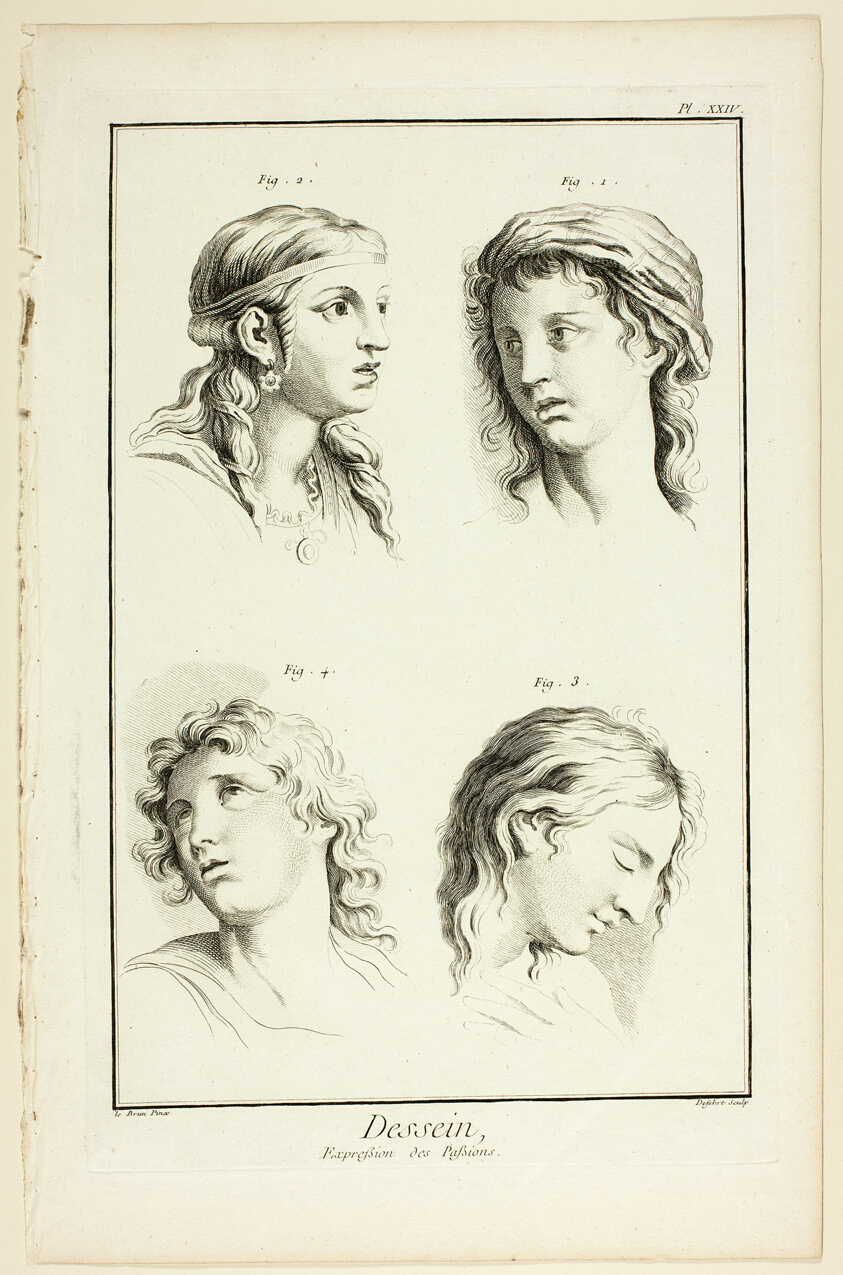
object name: Print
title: Drawing: Expressions of Emotion (Wonder, Love, Veneration, Rapture), from Encyclopédie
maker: A. J. Defehrt (French, active 18th century); after Charles le Brun (French, active 17th century-1765); published by André le Breton (French, 1708-1779), Michel-Antoine David (French, c. 1707-1769), Laurent Durand (French, 1712-1763), and Antoine-Claude Briasson (French, 1700-1775)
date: 1762/77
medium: Etching with engraving on cream laid paper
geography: France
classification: etching; print; prints and drawing